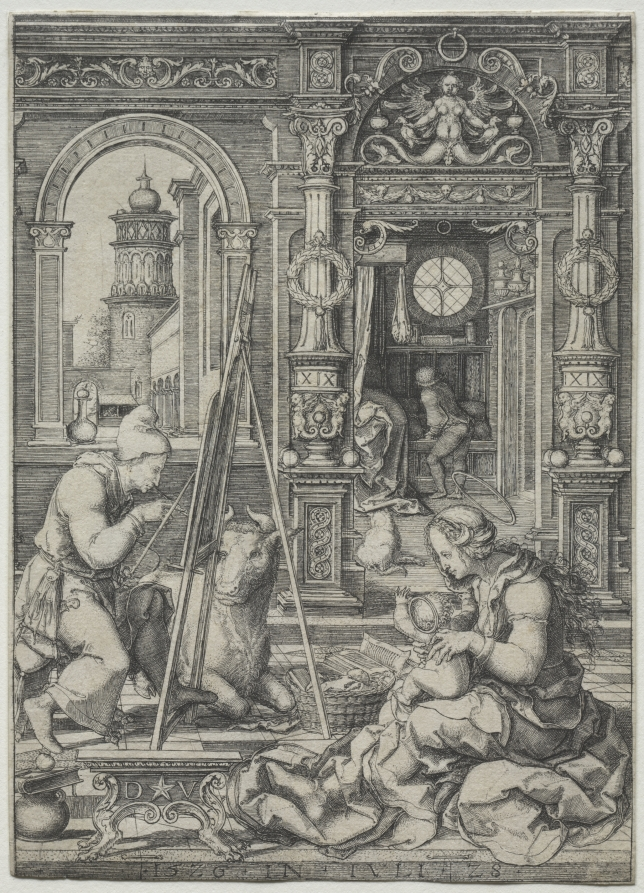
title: St. Luke Painting the Virgin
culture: Netherlands, 16th century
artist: Dirk Vellert (Netherlandish, 1480/85–1547)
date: 1526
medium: engraving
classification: Print